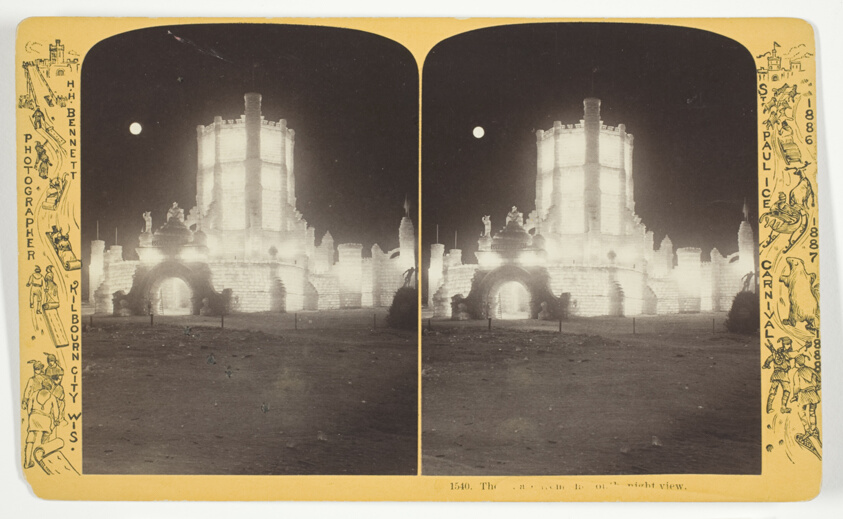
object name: Photograph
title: [Illedigible], , No. 1540 from the series "St. Paul Ice Carnival"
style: 19th century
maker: Henry Hamilton Bennett (American, born Canada, 1843-1908)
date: 1886/88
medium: Albumen print, stereo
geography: Wisconsin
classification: photography; photograph; albumen silver print; stereograph (albumen)